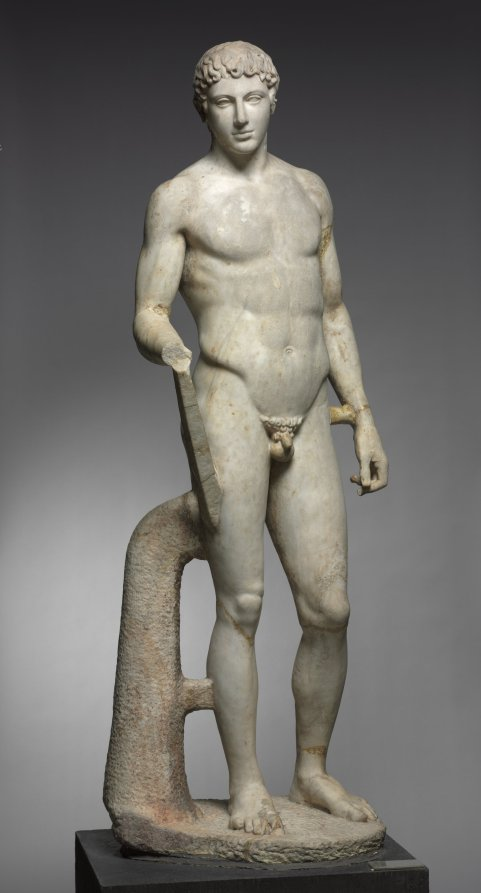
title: Statue of an Athlete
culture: Italy, Roman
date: 1–100 CE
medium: marble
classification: Sculpture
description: This idealized athlete recalls Greek sculptural types invented and popularized during the 400s BC. Large-scale athletes and other sculptures like this were originally created by famous artists as sanctuary dedications. Centuries later, they were widely copied and adapted by Roman sculptors, whose clients sought their own versions of earlier masterpieces. Working in marble rather than bronze, these sculptors added certain elements for stability, such as the struts and the large tree trunk beside the right leg here. Sculptures like this one are profoundly complex, made by and for Romans but descended from Greek ancestors.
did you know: For many years, this sculpture stood in the rotunda of the Cleveland Museum of Art.